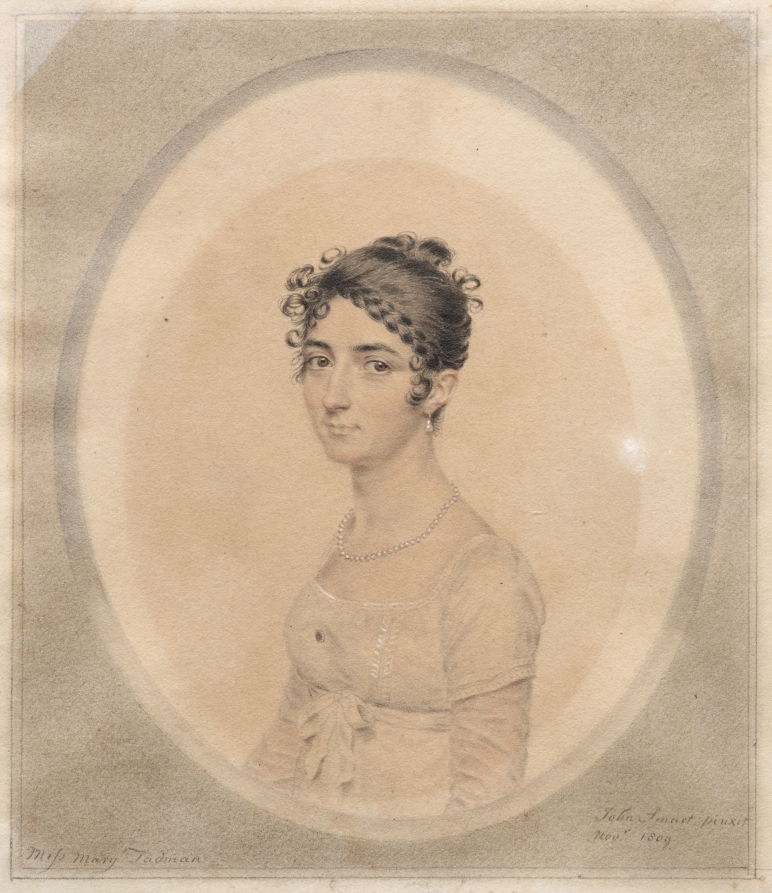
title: Portrait of Miss Mary Tadman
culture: England, 18th century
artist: John I Smart (British, 1741–1811)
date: 1809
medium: watercolor and graphite, heightened with traces of white gouache on paper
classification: Portrait Miniature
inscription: signed, lower right, in gray watercolor: John Smart pinxit / Novr. 1809 ; by artist, lower left, in gray watercolor: Miss Mary Tadman ; VERSO, upper left, in graphite: B/8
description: Mary Tadman’s head and shoulders face right. Her eyes are brown, and she wears a necklace of small pearls and a drop pearl earring. She wears her dark brown hair high in a classically inspired bun, with a braid across the hairline and many curls falling over her forehead and in front of her ears. Her white dress is delicately embroidered at the edges along the bust and is tied at the empire style waist, with a small pin fastened to the front. The translucent white sleeves worn beneath the dress are probably made of muslin and detachable, since they do not appear in the ivory version of the portrait. Detachable sleeves were popular during the late eighteenth and early nineteenth centuries and enabled a dress to function as day- and eveningwear. The nature of this work as a finished drawing rather than exclusively a preparatory sketch for a miniature on ivory is evident in the degree of finish of the sitter’s clothing, heightened with white gouache and painted to the elaborated penciled oval border. In December 1809, the year this drawing was executed, Mary Tadman (1786–1862) married Major William Jolliffe Eldridge. He died in 1818 in Poona, India, and three years later, his widow married Colonel Daniel Hutchins Bellasis (1785–1836), with whom she had two children: Flora and Augustus Fortunatus. Mary lived for nearly two decades in India, where she was a celebrated beauty, and where her second marriage into the militarily distinguished Bellasis family seems to have secured her presence in high society. On the occasion of her marriage in 1821, she wrote her spinster sister, “I forgot I have not told you a word of my marriage, which by the by was the grandest affair known in Bombay, I am almost tired of the subject—visits and congratulations, etc. The Governor and Staff went with me to Church . . . and all the people of any consequence in Bombay about 100 came to a Breakfast at Randall Lodge—since which it has been one constant scene of gaiety. Last week, pity me when I tell you, how I was obliged to exert myself—we gave a dinner party to 40 people. The Governor’s family . . . and all the Big Wigs who gave me parties—the same evening 160 came at ten to a dance—afterwards a supper very splendid I assure you.” A related ivory version of this miniature is in the Fitzwilliam Museum, Cambridge, signed and dated at the lower left: “J S / 1809.” While Miss Tadman’s coiffure, countenance, jewelry, and dress are identical to the Cleveland sketch, in this portrait she wears an elaborate black and red, flowered Indian shawl with white border over her white dress, the under-sleeves omitted. Indian shawls, particularly those from Kashmir, were extremely expensive signifiers of social status in India and Europe, and by the end of the eighteenth century, they often formed part of the trousseau of a wealthy French or English bride. The shawls were particularly fashionable worn in contrast with the high-waisted gauzy white dresses of the Empire period. While many portraits and miniatures from the early nineteenth century depict women conspicuously displaying their Indian shawls, Miss Tadman wears hers in a manner not often seen in European portraits: across one shoulder and around the waist, like a sari. Mary and William Eldridge wed in December 1809, one month after Smart signed this sketch. Because Smart depicted Miss Tadman during her engagement, the shawl worn in the finished ivory portrait may have been a gift from her betrothed, who had been stationed in Bombay in 1809. While appropriate for a half-length portrait, the under-sleeves were probably deemed unnecessary for the miniature, which shows little of the arm and instead depicts the sitter more formally, wrapped in her shawl. The existence of a larger, finished drawing as well as a miniature on ivory suggests that the finished drawing may have served a variety of roles, while also implying that another preparatory sketch for both may exist. At nearly twice the size of the ivory, Cleveland’s drawing is not likely to have been the sole preparatory exercise for the finished miniature. There is no question that as a young bride-to-be, Miss Tadman was thinking carefully about how she wished to be represented at a pivotal moment in her life, and that a single portrait was insufficient to accommodate all of the accoutrements that were of significance to her. The neo-Grec coiffure, au courant empire waist dress with detachable sleeves, pearl parure, ornamental pin, and costly shawl communicate clearly the social ambitions to which her biography is also a testament.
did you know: This drawing was passed on through the generations of the artist John Smart's family until 1937 when his great-granddaughter sold it.